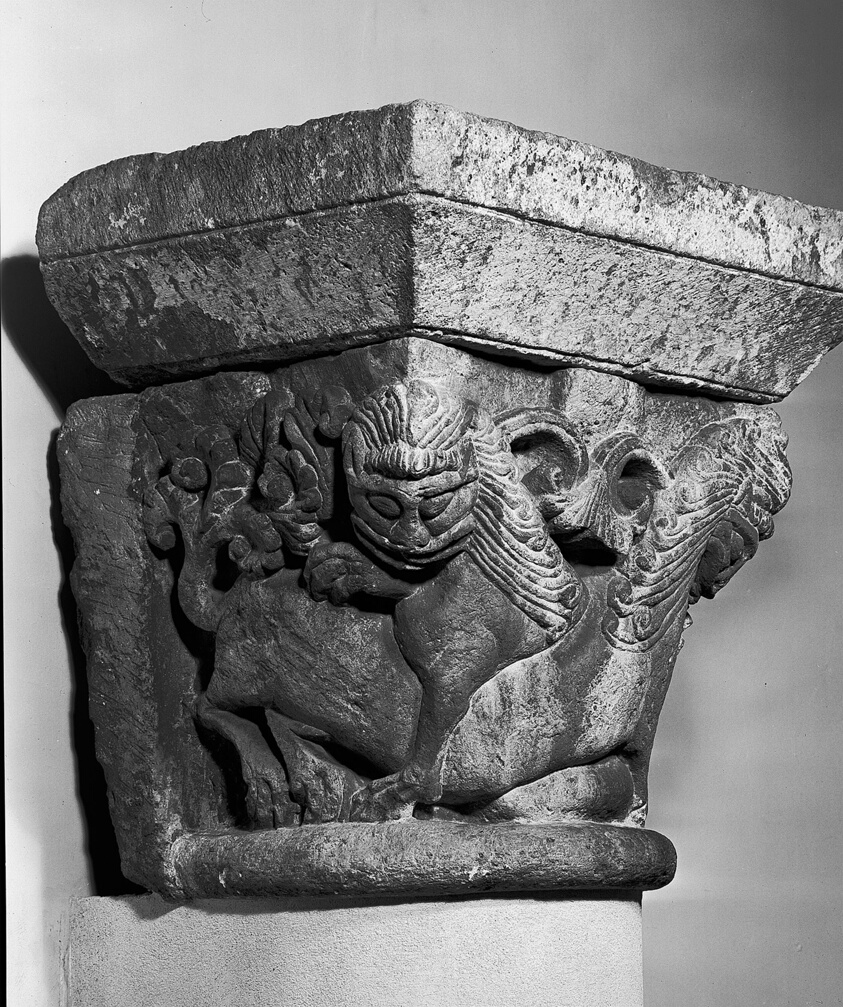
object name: Sculpture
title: Capital with Lions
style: medieval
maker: French; Charente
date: 1100/1150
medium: Limestone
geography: France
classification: architectural sculpture; sculpture; sculpture/stone; limestone; stone; french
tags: lions, animals, architechture, architectural, architectural detail, architectural fragment, architectural fragments